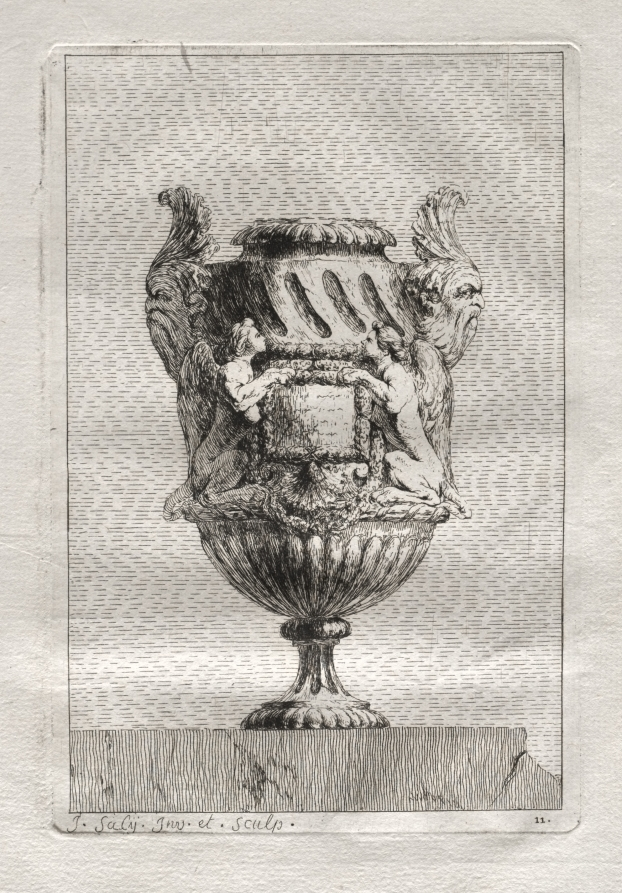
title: Suite of Vases: Plate 11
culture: France, 18th century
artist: Jacques François Saly (French, 1717–1776)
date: 1746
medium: etching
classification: Print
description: Designing ornamental vases or urns was particularly popular during the mid-18th century since the only limit to the possibilities was the imagination of the artist. Saly, a sculptor by training, was a student at the French Academy in Rome from 1740 to 1746, at which time he published a set of 30 etchings. Saly began with basic antique vase forms but deviated from classical ornament to use a rich variety of fantastic creatures for embellishment.